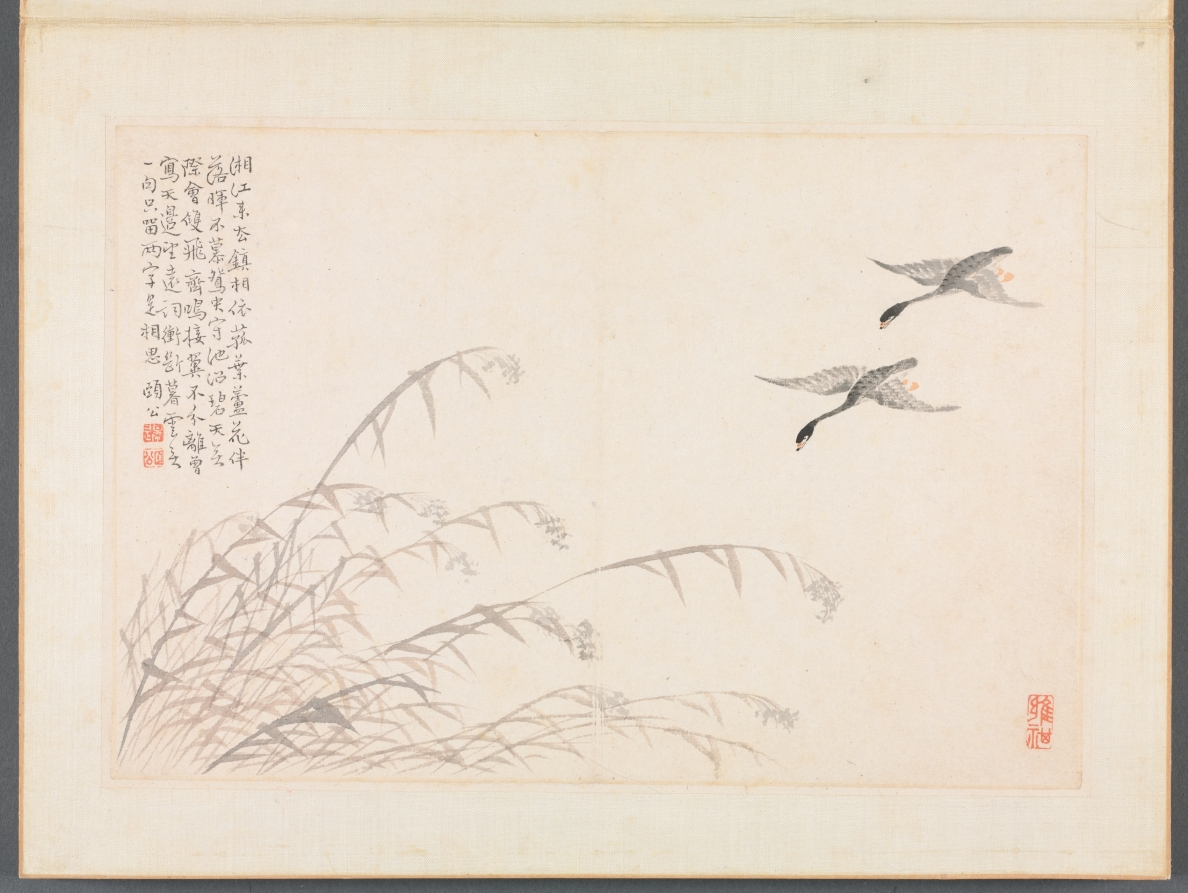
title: Album of Calligraphy and Paintings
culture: China, Qing dynasty (1644-1911)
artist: Bian Shoumin (Chinese, 1684–1752)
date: first half of the 1700s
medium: album leaf; ink and color on paper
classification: Painting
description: The artist Bian Shoumin is known for his depiction of wild geese, water, and reeds. The migrant birds in autumn and winter evoked, in the minds of the Chinese intelligentsia, a time of parting and sorrow.